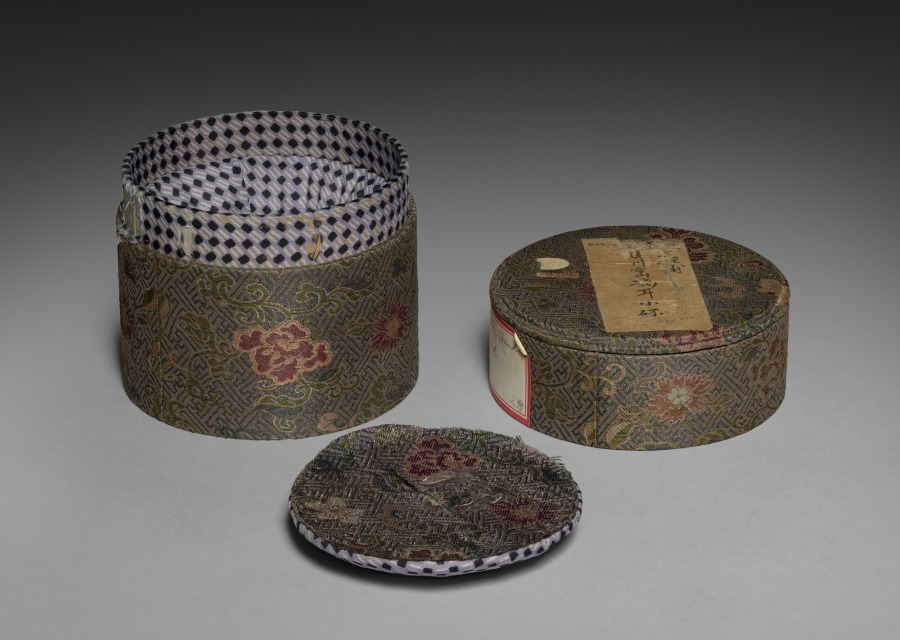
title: Fluted Cup with Dragon Handle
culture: China, Jiangxi Province, Jingdezhen kilns, Yuan dynasty (1271–1368)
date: early 1300s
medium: Glazed porcelain, Qingbai (bluish-white) ware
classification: Ceramic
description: Very thinly potted, the subtly lobed body of this cup is almost translucent. The thin, slightly opaque, light greenish glaze lends a sugary shine. Applied elements, including the handle, beaded borders, and sculptural floret, are constructed and glazed with the same materials as the body, providing a seamless blend of form and decorative embellishment. The result is an evocative reminder of slightly earlier silver cups, also created in the form of flowers. This pristine, natural construction is challenged, however, by the archaic dragon that acts as the handle. Borrowed from the decoration found on much earlier bronzes, this added form illustrates the eclecticism of the Yuan, the attempt to blend present vision with interest in the past.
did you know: Clay beading divides the cup's interior into six foliate panels with a six-petaled flower at the junction of the beaded lines.